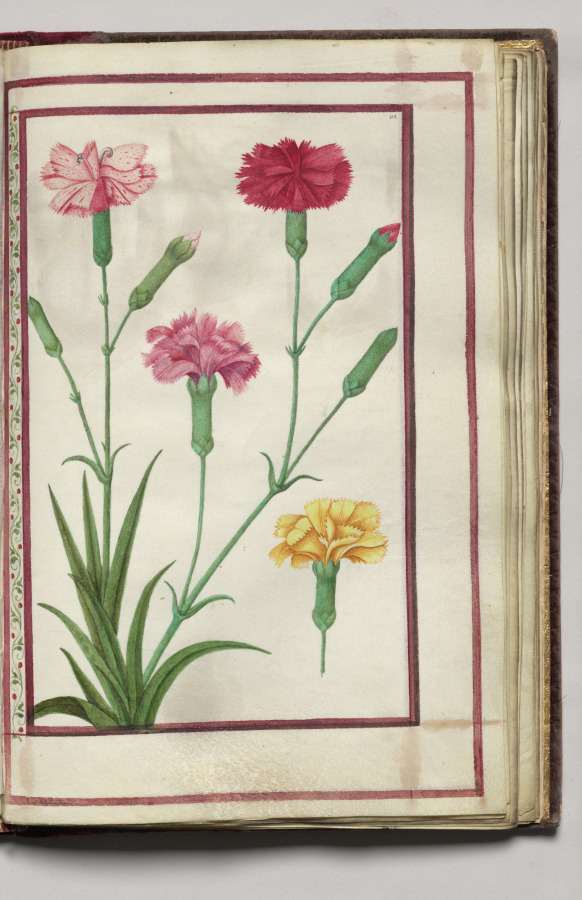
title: Carnations, folio 31 (recto), from Florilegium (A Book of Flower Studies)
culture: France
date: 1608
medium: watercolor, ink, silver, and gold over occasional traces of pencil, on vellum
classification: Bound Volume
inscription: Dated: Poitiers 1608 (on frontispiece) Signed: On frontispiece in black ink, lower right: Van Kuyk Notation on drawing: Frontispiece: in pencil, lower margin: * élève de Van Kessel, peintre flammand (* in pencil also appears in front of Van Kuyk's name).